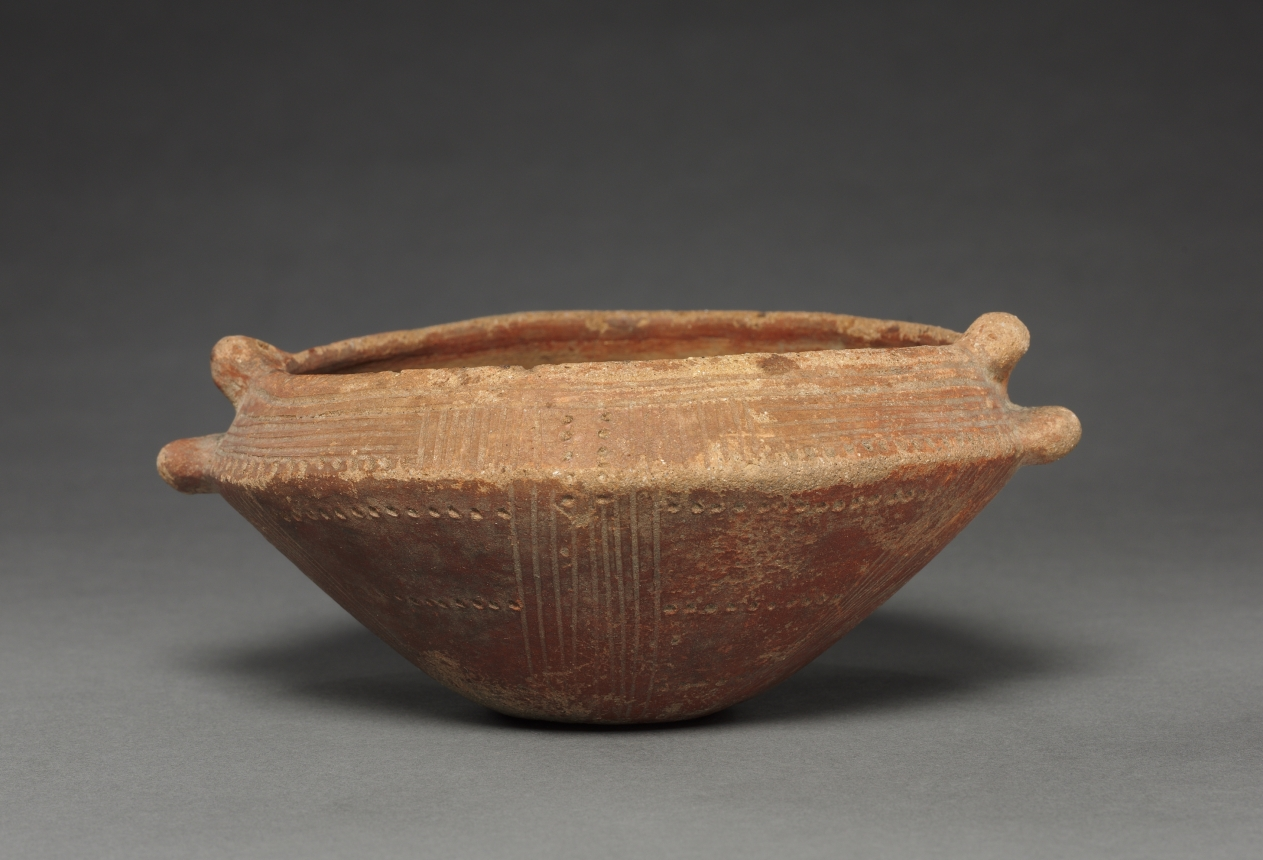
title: Jar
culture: Colombia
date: before 1550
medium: red ware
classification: Ceramic